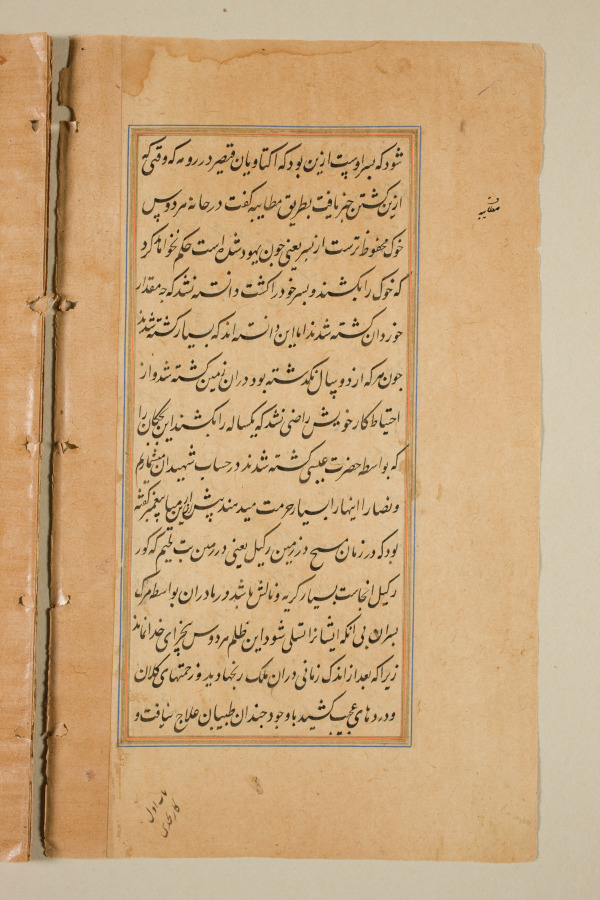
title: Text page from a Mirror of Holiness (Mir’at al-quds) of Father Jerome Xavier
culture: Mughal India, Allahabad, made for Prince Salim (1569–1627)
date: 1602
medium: Ink and gold on paper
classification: Manuscript